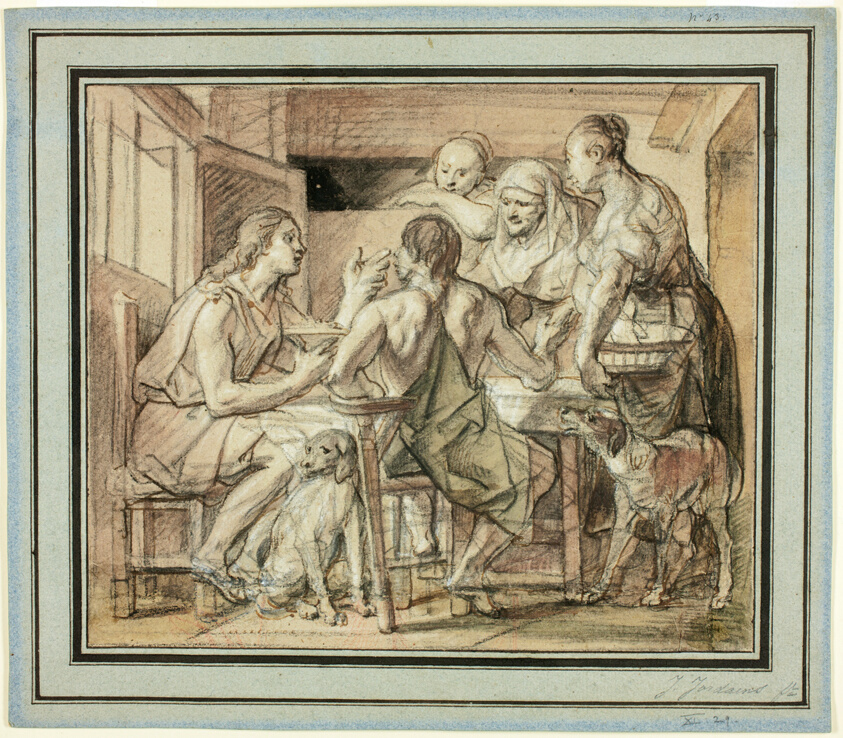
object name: Drawing and Watercolor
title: Jacob and Esau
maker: Jacob Jordaens (Flemish, 1593-1678)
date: c. 1655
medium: Charcoal, pen and brown ink, and brush and brown washes, heightened with opaque white watercolor, on pieced cream laid paper, laid down on blue laid paper, ruled in pen and brown ink, laid down on tan laid paper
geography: Flanders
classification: charcoal; paper; prints and drawing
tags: dogs, animals